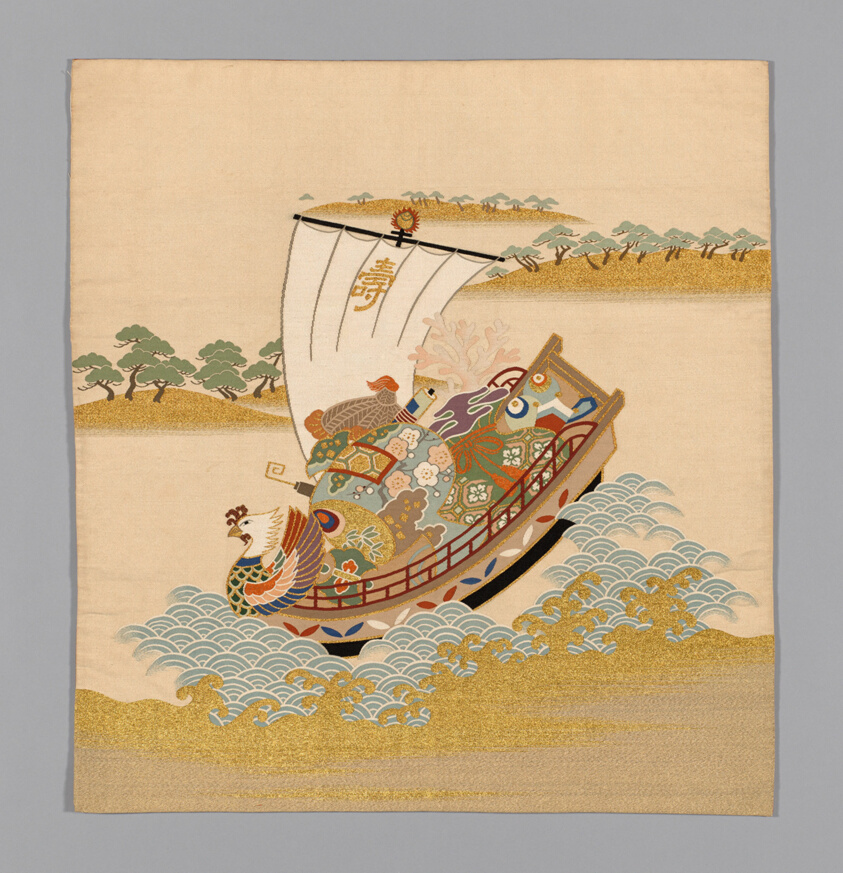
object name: Textile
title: Fukusa (Gift Cover)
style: taisho, Japanism, East Asian, asian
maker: Japan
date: Taishô period (1912–1926), c. 1912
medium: Woven in one piece (hikikaeshi); Mon side: silk, slit and single interlocking weave (tsuzure); Decorative side: silk and gold-leaf-over lacquered-paper-strip wrapped silk, slit an dovetailed tapestry weave (tsuzure)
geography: Japan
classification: textile; weaving